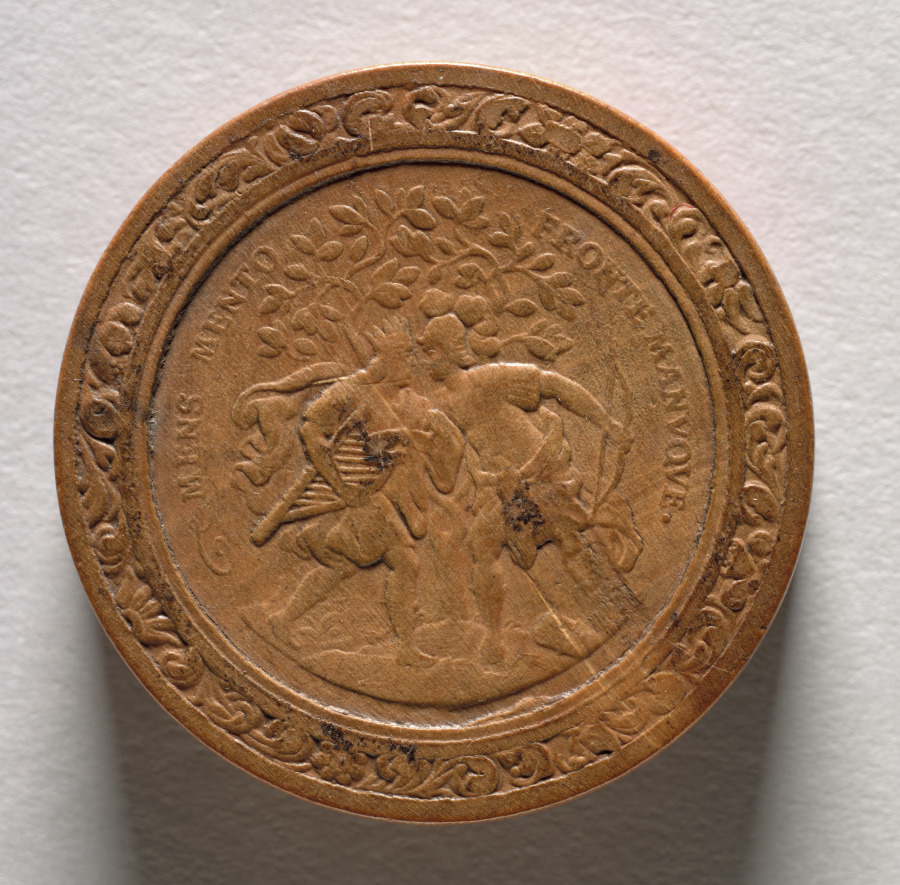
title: Gaming Piece (obverse)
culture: Germany, late 17th-early 18th Century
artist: Martin Brunner (German, 1659–1725)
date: c.1700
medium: wood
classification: Furniture and woodwork